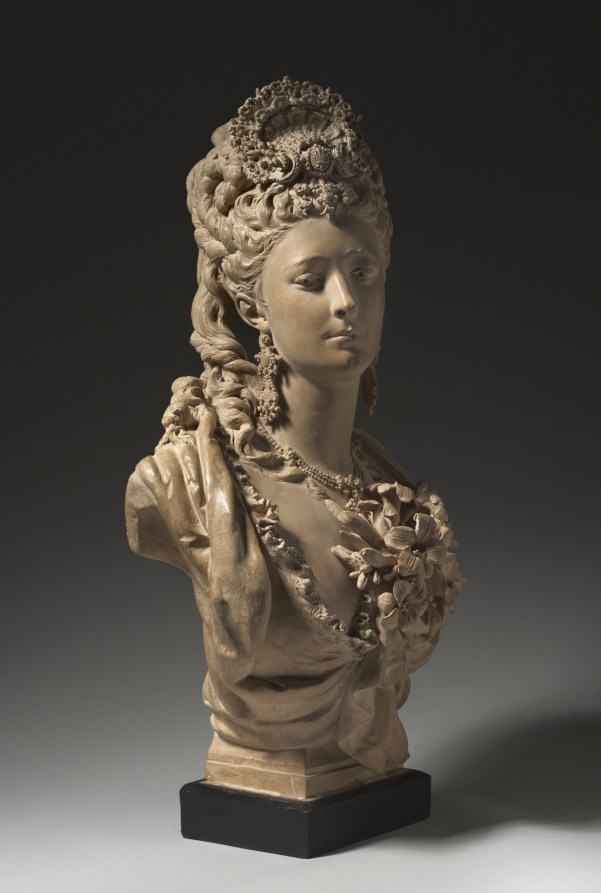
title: Portrait Bust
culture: France, 19th century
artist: Albert-Ernest Carrier-Belleuse (French, 1824–1887)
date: c. 1865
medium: terracotta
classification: Sculpture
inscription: incised in the clay on the back: "A. Carrier"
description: Among the artists who reacted against the static poses of neoclassical art, Carrier-Belleuse drew inspiration from the opulence and excess of Rococo portraiture of the 1700s. This bust resembles one of Napoleon III's mistresses, Marguerite Bellanger, whose features the artist is known to have borrowed for his female busts. Carrier-Belleuse received commissions from Napoleon III, ruler of France from 1852 to 1870, and contributed to the sculptural decorations of the Louvre and Opera Garnier in Paris.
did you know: The possible muse for this bust, Virginia Oldonia, was a countess know for her drama and costumes.